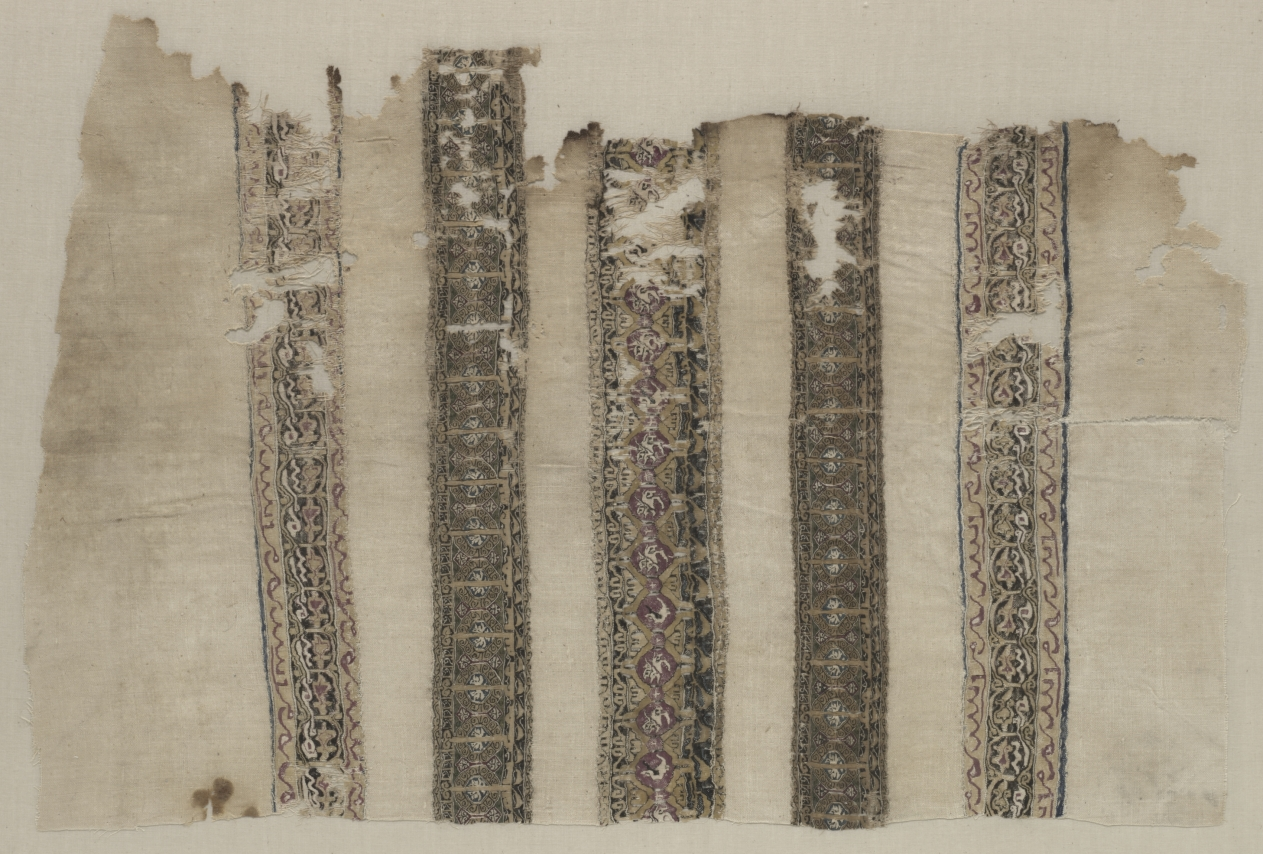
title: Fragment Composed of Parts of Three Tiraz-Style Textiles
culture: Egypt, Fatimid period, probably during Caliphate of al-Musta'li, AH 487-495 (A.D. 1094-1101)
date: 1094 – 1101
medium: tapestry (originally inwoven in a tabby ground); linen and silk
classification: Textile